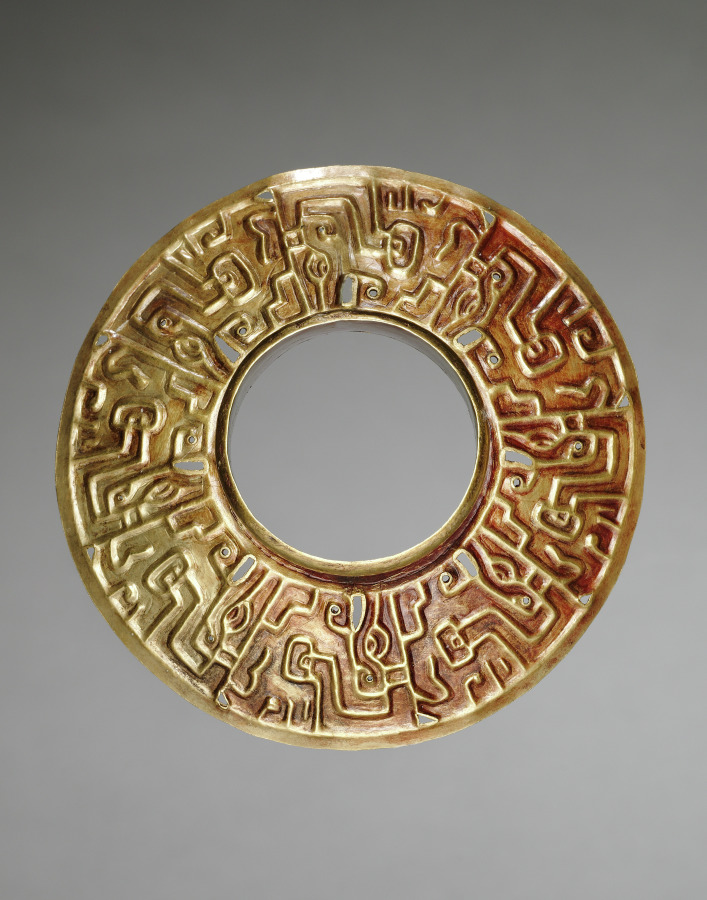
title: Ear Ornament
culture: Peru, North Highlands, Chavín de Huantar(?), Chavín style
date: c. 500–200 BCE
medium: hammered and cut gold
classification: Metalwork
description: There seems to be a link between Chavín religion and appearance of the Andes’ first large precious-metal objects, made using revolutionary new metallurgical processes. Chavín may have developed these technical innovations to express the inexpressible, the "wholly other" nature of its religion. In many areas, elite men and women wore the ornaments as emblems of their ties to this religion, and eventually were buried with them. These 16 objects, along with three others not in the museum’s collection, are said to have come as a group from Chavín itself.